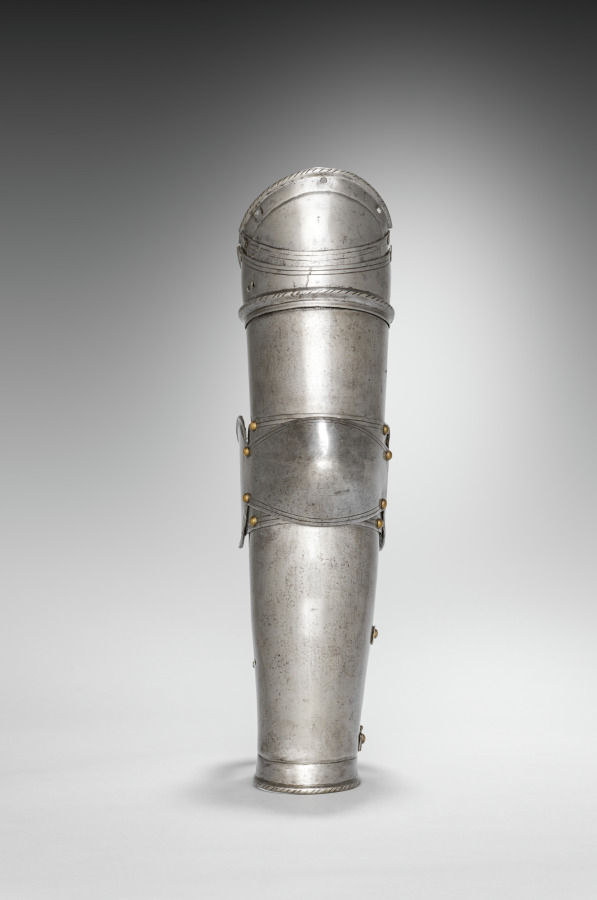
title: Proper Left Arm (Vambrace, Rerebrace and Couter)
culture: South Germany, 16th century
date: c. 1560–1580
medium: steel, leather straps, brass rivets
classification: Arms and Armor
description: This armor was developed for the joust-a sporting combat between two mounted contestants. Although all of the elements of this armor date from the same period, they are not all from the same suit. This armor is thus called "composed." It also shows the asymmetry of jousting armor. The participants rode along a wall-like barrier known as a "tilt" with their left sides facing one another. Consequently, armor on that side of the body had to be thicker. Note the large plate (grandguard) over the left shoulder for extra protection. Also, the breathing holes in the helmet were placed on the right side (farthest from an opponent's lance) to avoid injuries from splinters. The bracket attached to the right breastplate is called the lance-rest, a shock-absorbing support designed to accommodate the lance when "couched" under the right armpit.